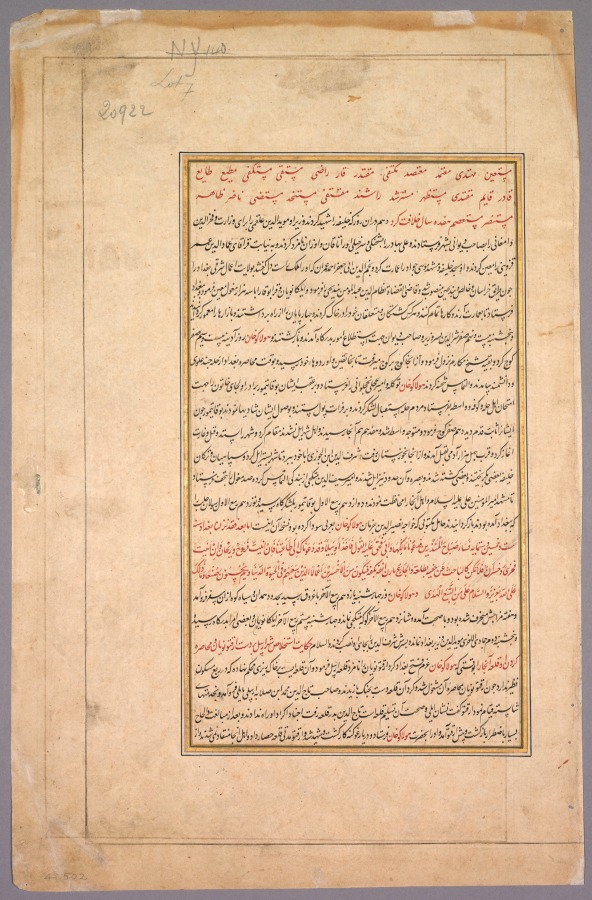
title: Calligraphy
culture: Mughal India, court of Akbar (reigned 1556–1605)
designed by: Basavana (Indian, active c. 1560–1600)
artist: Sur Das (Indian)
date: c. 1596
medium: Gum tempera, ink, and gold on paper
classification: Calligraphy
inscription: recto lower left: [translated] Siege of the fort of Irbil by Urgatu Nuyan and the attainment of victory by command of Hulagu Khan.; verso overall: [text]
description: Akbar, the third Mughal emperor of India, commissioned an illustrated copy of the Chingiz-nama, a historical text written in Persian during the early 1300s by a Jewish scholar who converted to Islam. The Chingiz-nama is an account of the conquests of Akbar’s ancestors, the Mongols, who swept across the Asian continent from Siberia to the Mediterranean Sea during the 1200s. This page describes the final momentous defeat of the caliph of Baghdad, the religious head of Sunni Islam and political leader of the Abbasid dynasty, with the names of all the caliphs who came before him listed in red at the top.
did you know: This fortified city in the heart of Kurdistan, now called Irbil, is in Iraq.